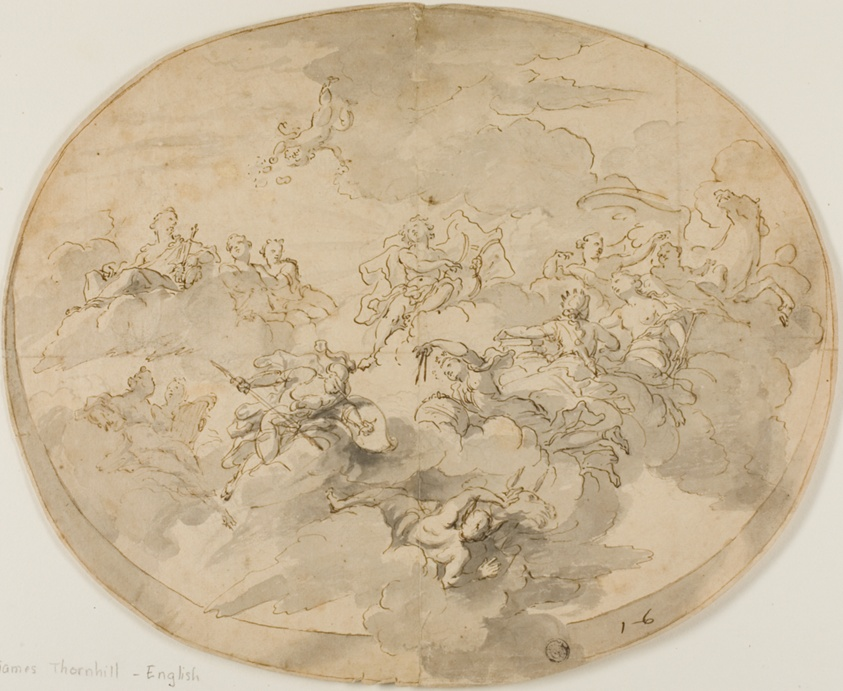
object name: Drawing and Watercolor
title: Design for Ceiling Fresco: Apollo and the Muses with Minerva Destroying Ignorance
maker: James Thornhill (English, 1675-1734)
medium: Pen and brown ink with brush and gray wash, over black chalk and graphite, on tan laid paper, partially laid down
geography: England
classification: pen and ink drawings; drawings (visual works); prints and drawing